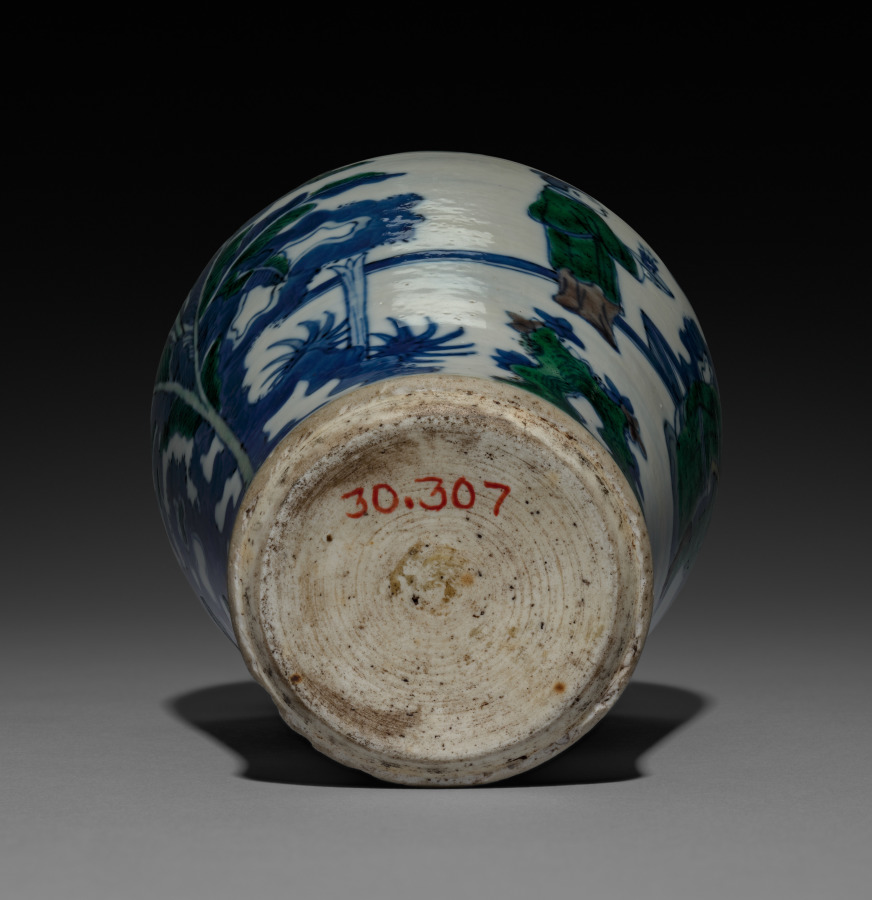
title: Vase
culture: China, Jiangxi province, Jingdezhen kilns, Ming dynasty (1368-1644), Wanli reign (1572-1620)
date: 1573–1620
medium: porcelain with underglaze blue decoration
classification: Ceramic